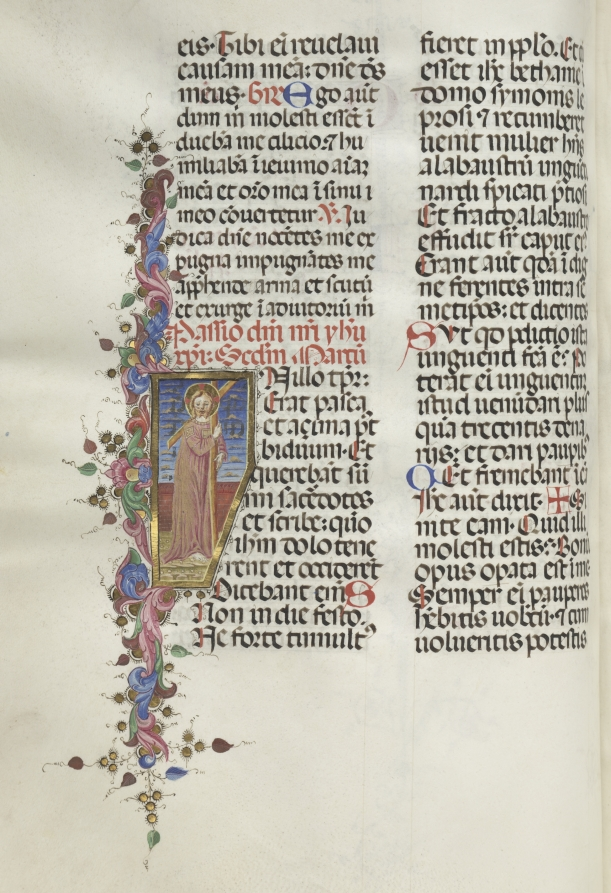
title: Missale: Fol. 124v: Christ holding the Cross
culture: Italy, Perugia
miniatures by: Bartolommeo Caporali (Italian, c. 1420–1503)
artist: assisted by Giapeco Caporali (Italian, d. 1478)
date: 1469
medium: ink, tempera and burnished gold on vellum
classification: Bound Volume